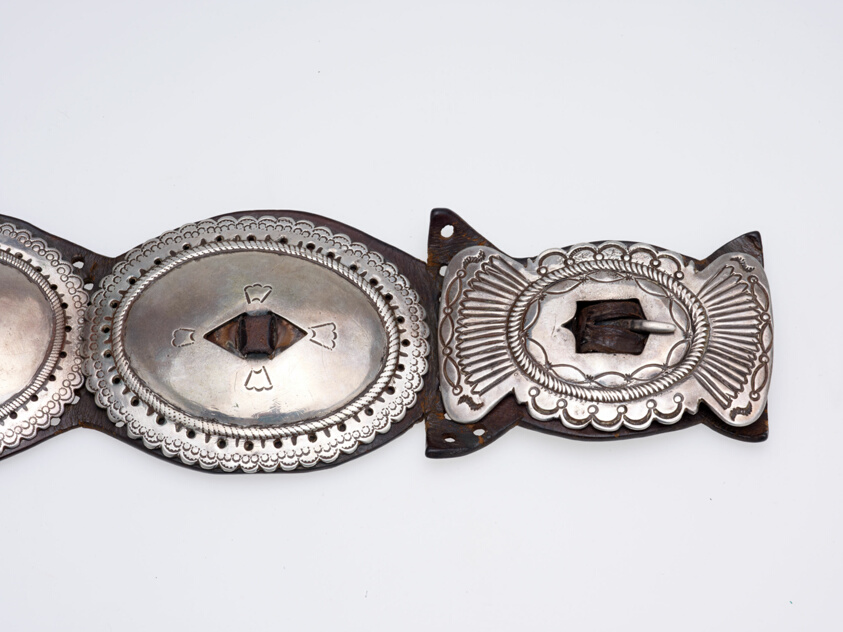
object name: Costume and Accessories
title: Concho Belt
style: navajo, dine, americas, native american, native north american, Arts of the Americas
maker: Navajo (Diné) (Northern New Mexico or Arizona, United States)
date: 1880–95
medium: Silver and leather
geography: Arizona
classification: belts (costume accessory); art of the americas; costume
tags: jewelry, geometric, silver (color), status